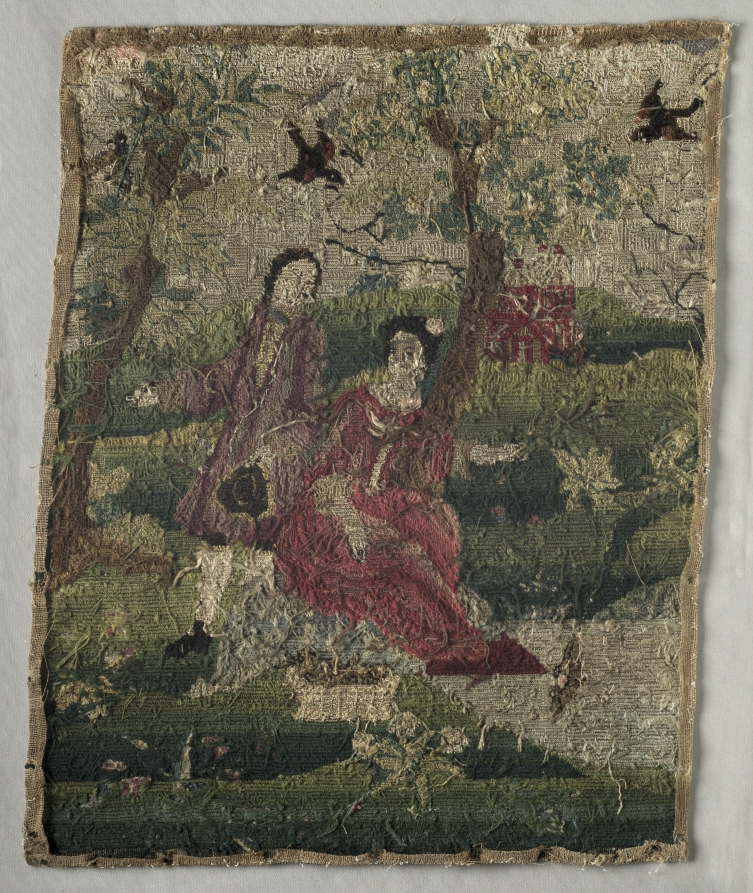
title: "Fishing Lady"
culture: America, Massachusetts, Boston, 18th century, 1st half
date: 1700s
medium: plain weave linen? with embroidery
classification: Embroidery